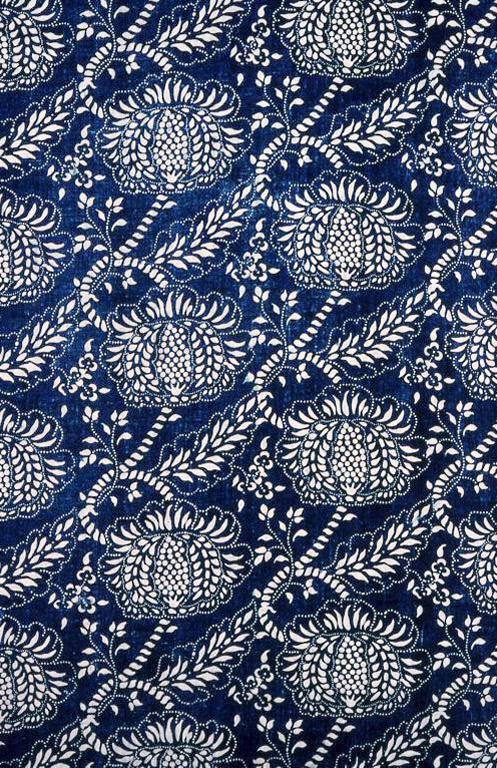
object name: Textile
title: Panel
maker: United States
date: 1701/25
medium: Cotton; block printed; shaded areas produced by a second printing using bleach instead of a dye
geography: United States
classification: textile; weaving - printed